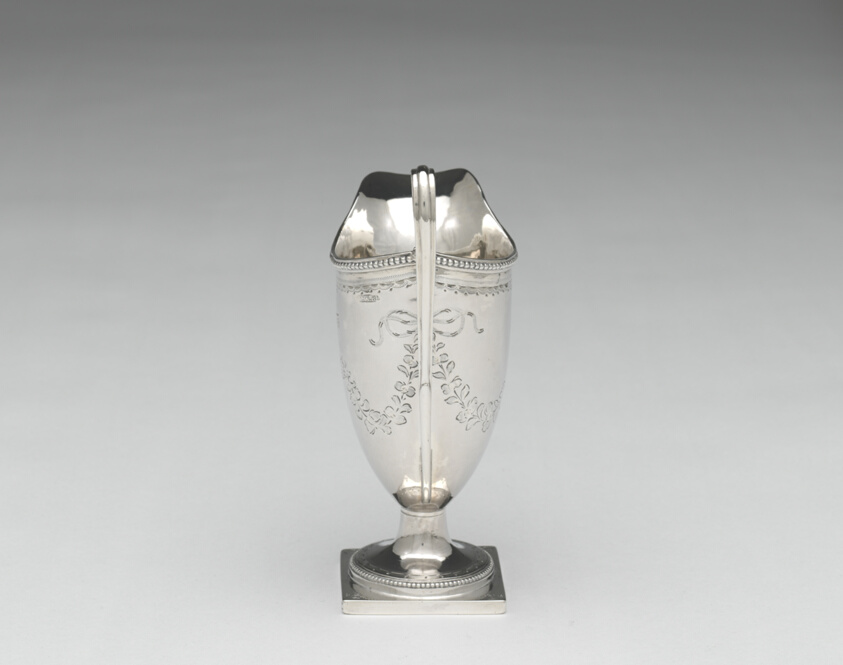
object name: Metalwork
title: Milk Pot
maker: Paul Revere Jr.; American, 1734–1818; Boston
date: 1784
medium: Silver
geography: Boston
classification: creamer; silver; american decorative arts; american arts; decorative arts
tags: dining, drinking